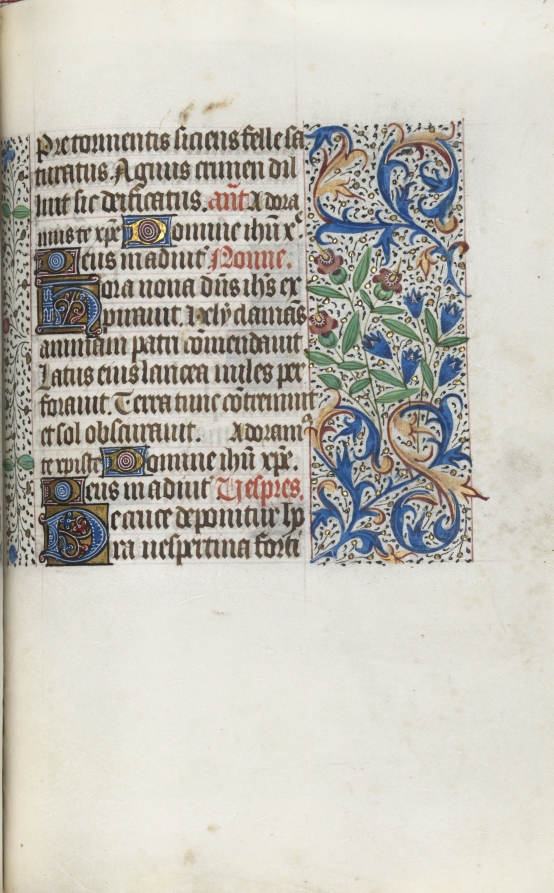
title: Book of Hours (Use of Rouen): fol. 98r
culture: France, Rouen, 15th century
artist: Master of the Geneva Latini (French, active Rouen, 1460–80)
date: c. 1470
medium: ink, tempera, and gold on vellum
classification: Bound Volume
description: In the late 1400s and early 1500s Rouen was an established and important center of book production. The city’s cathedral had a wealthy chapter that spent large sums of money to commission books and to maintain its extensive library. The stationers and booksellers would have likely been concentrated in or near the cathedral precinct. This artist, named after a manuscript now in Geneva, was Rouen’s principal illuminator during the second half of the 1400s.